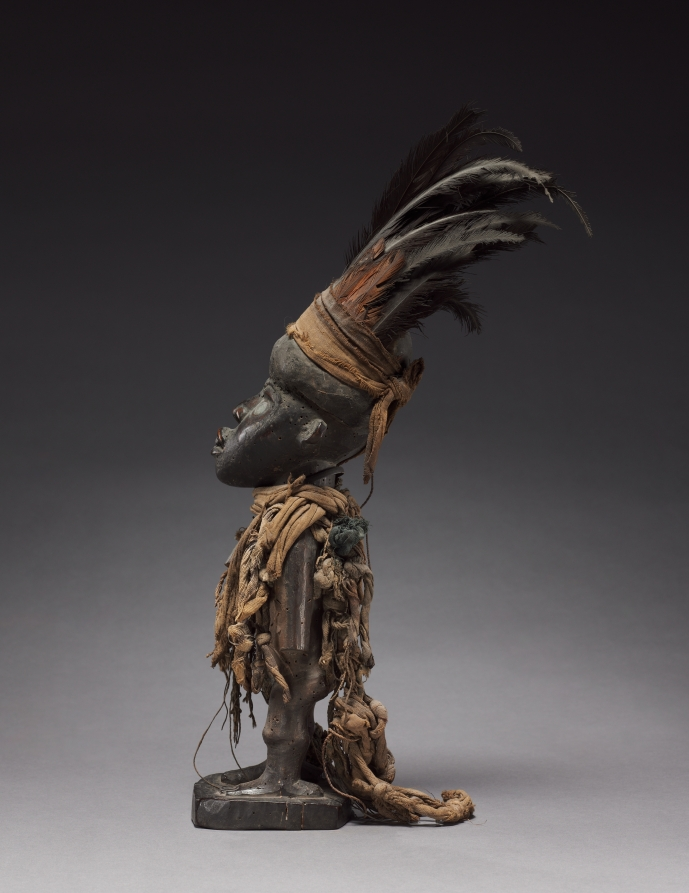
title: Male Figure (Nkisi)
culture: Africa, Central Africa, Democratic Republic of Congo, Cabinda, or Republic of the Congo, probably Vili-style maker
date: late 1800s-early 1900s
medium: Wood, cloth, resin, organic material, feathers, natural fibers, antelope horn, seashells (including cowrie shells), glass beads, metalized glass, and plant fiber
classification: Sculpture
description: Nkisi is an object that is believed to host an ancestral spirit. Unusual among these figures, this nkisi figure is missing its nduda, “night guns.” These guns would be filled with gunpowder functioning as defense against witches or misfortune. Unless its guns were lost during the course of its life history, this nkisi may instead be an example of a more general type called mpanzu, whose functions included protection.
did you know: Different from other figures functioning as defense against witches or misfortune, its “night guns,” or nduda, are missing.